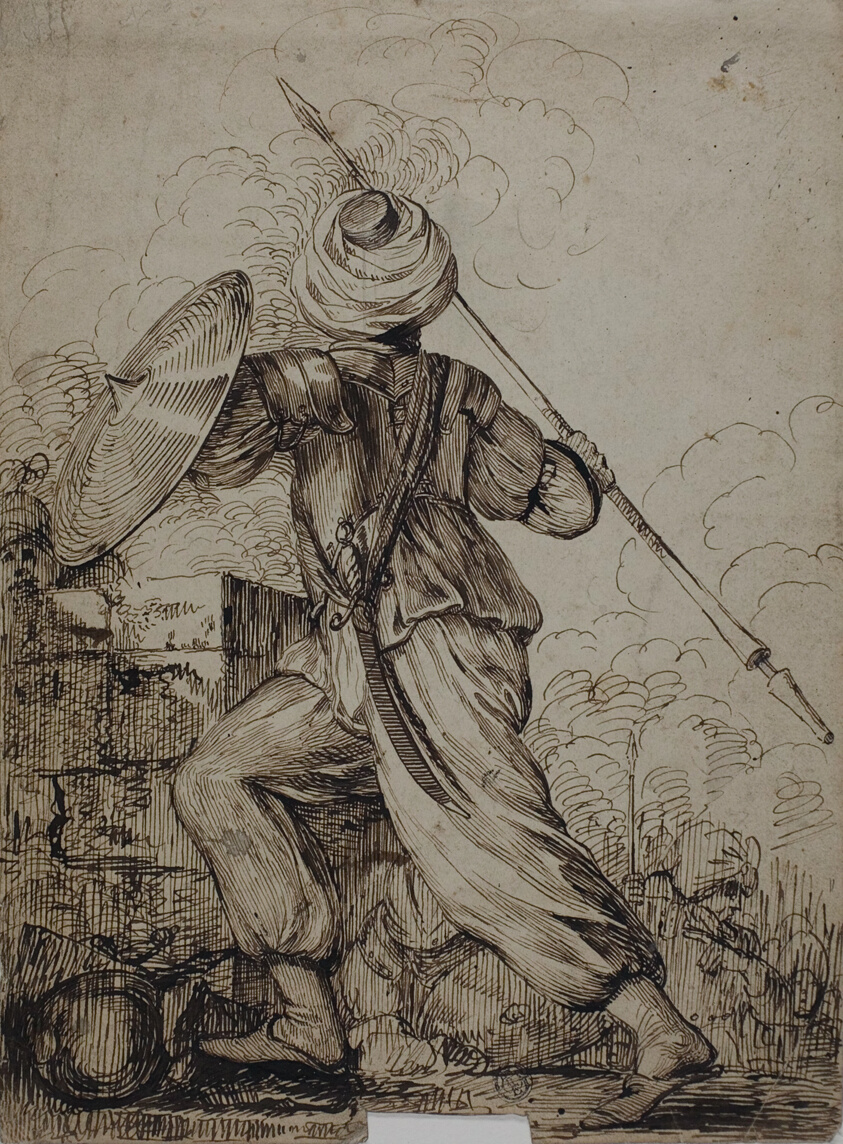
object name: Drawing and Watercolor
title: A Turkish Soldier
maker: Attributed to James Durno (English, c. 1745-1795); or John Hamilton Mortimer (English, 1740-1779)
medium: Pen and brown ink on cream wove paper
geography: England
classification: pen and ink drawings; drawings (visual works); prints and drawing